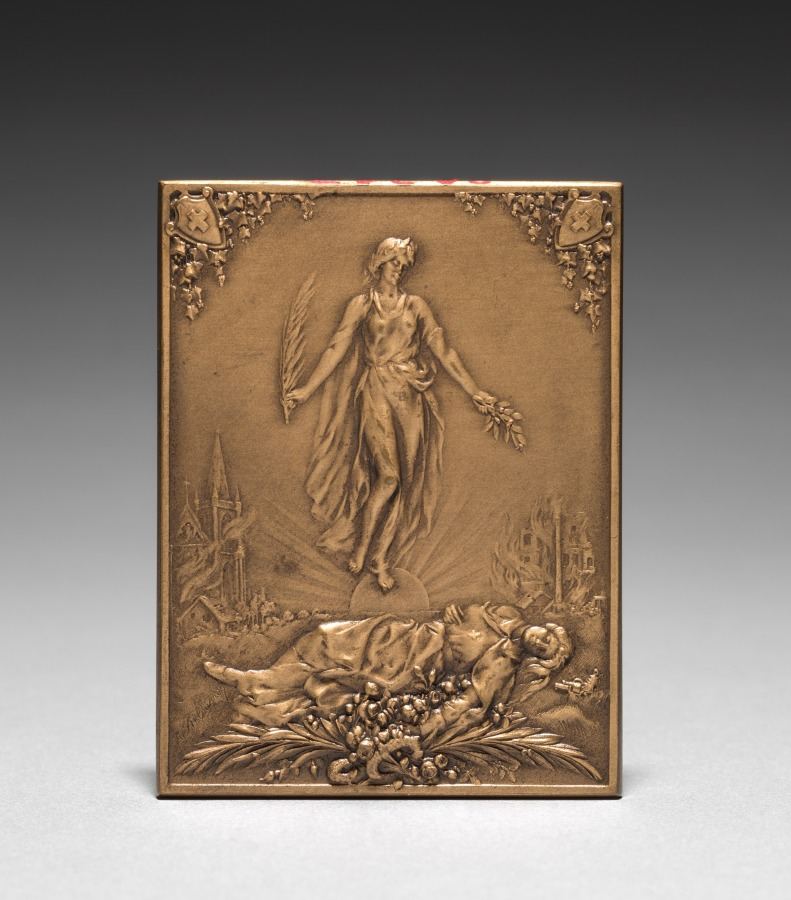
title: Medallion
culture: France, 19th-20th century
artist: Henri Emile Allouard (French, 1844–1929)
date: 1916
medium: bronze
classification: Metalwork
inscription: "Aux dames de la Croix rouge. Virtus Caritas."